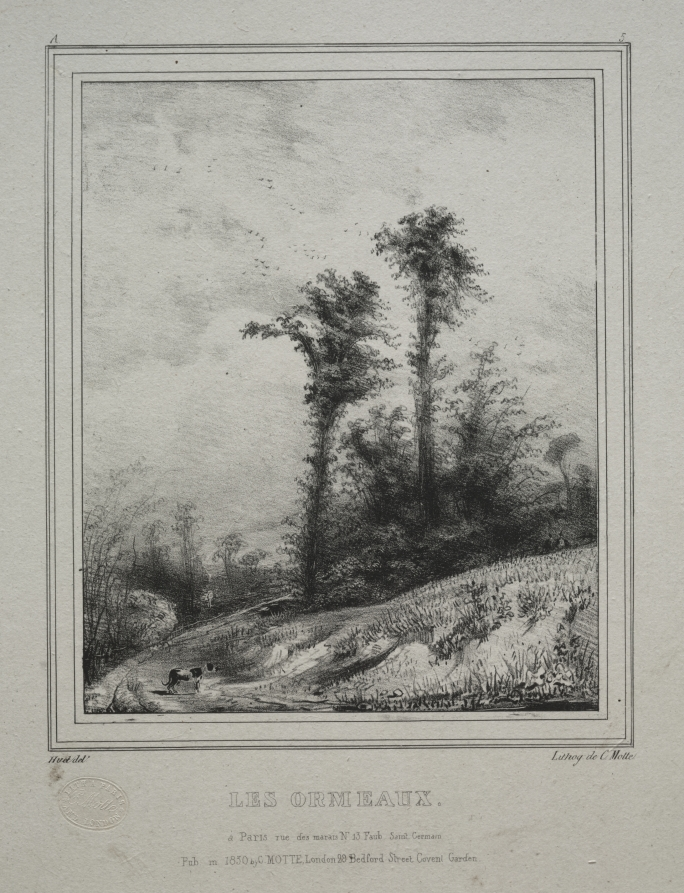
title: Landscapes: Young Elm Trees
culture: France, 19th century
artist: Paul Hüet (French, 1803–1869)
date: 1829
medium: lithograph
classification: Print